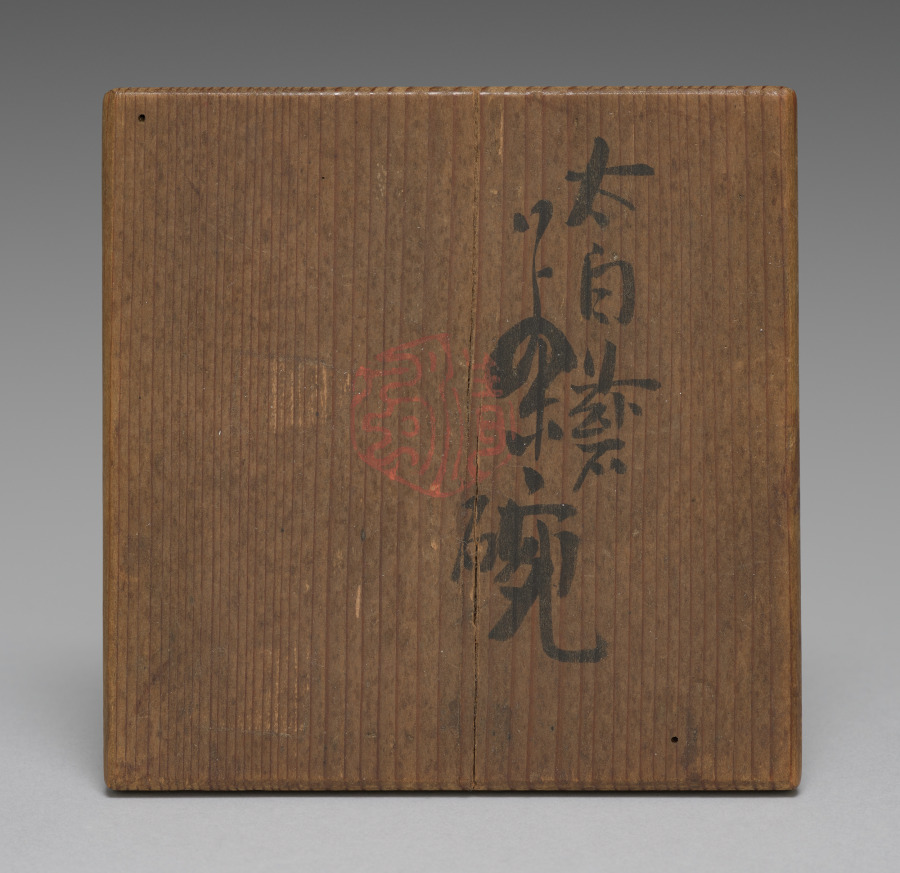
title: Teacups with Floral Band Motif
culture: Japan, Meiji period (1868–1912)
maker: Seifū Yohei III (Japanese, 1851–1914)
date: 1893–1914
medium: Set of five teacups; porcelain with incised decoration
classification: Ceramic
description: The five sencha teacups in this set are decorated with incised flowers and dots between a double band at the top and a single band at the bottom. They are in Yohei III’s creamy taihakuji body and glaze. In their motifs, they are quite similar to an incense burner by Yohei III (see CMA 2022.180), but the flowers are even more simple in design, with no open circle at the center. A label affixed to the side of the box refers to them as “sencha cups in emulation of Korean white [ware].” The reference to Korean ware indicates that even though Yohei was more directly inspired by Qing dynasty wares from the Dehua kilns in Fujian Province in developing his porcelain clay and glaze for works such as these, the general understanding of the continental models still placed them, at least in terms of color, among pieces broadly associated in Japan with Korean white wares. The delicate cups are thinly potted, so they have a highly desirable translucency.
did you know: The delicate cups are thinly potted, so they have a highly desirable translucency.